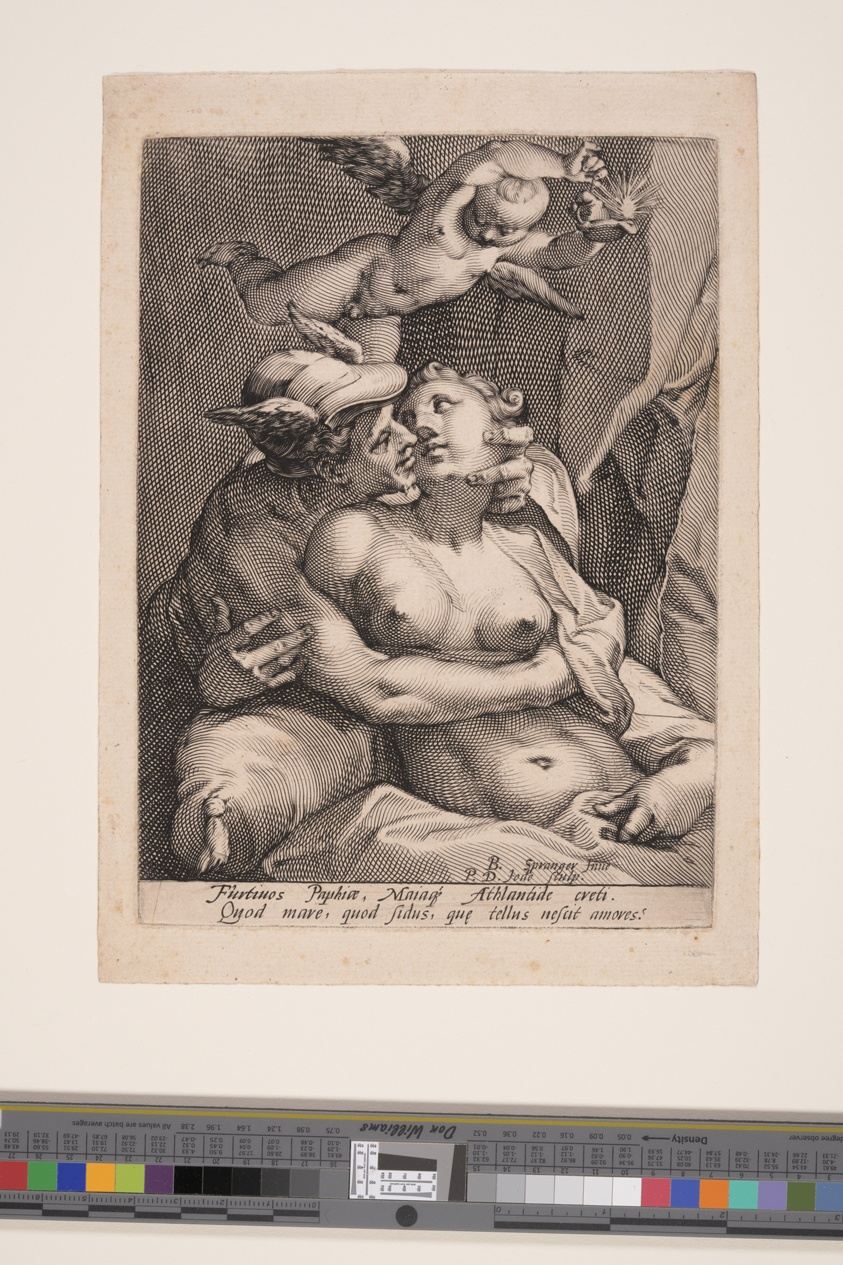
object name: Print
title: Mercury, Venus, and Cupid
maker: Pieter de Jode I (Flemish, 1570–1634); after Bartholomeus Spranger (Flemish, 1546–1611)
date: c. 1585-1600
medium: Engraving on laid paper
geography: Flanders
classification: engraving; paper; print; prints and drawing